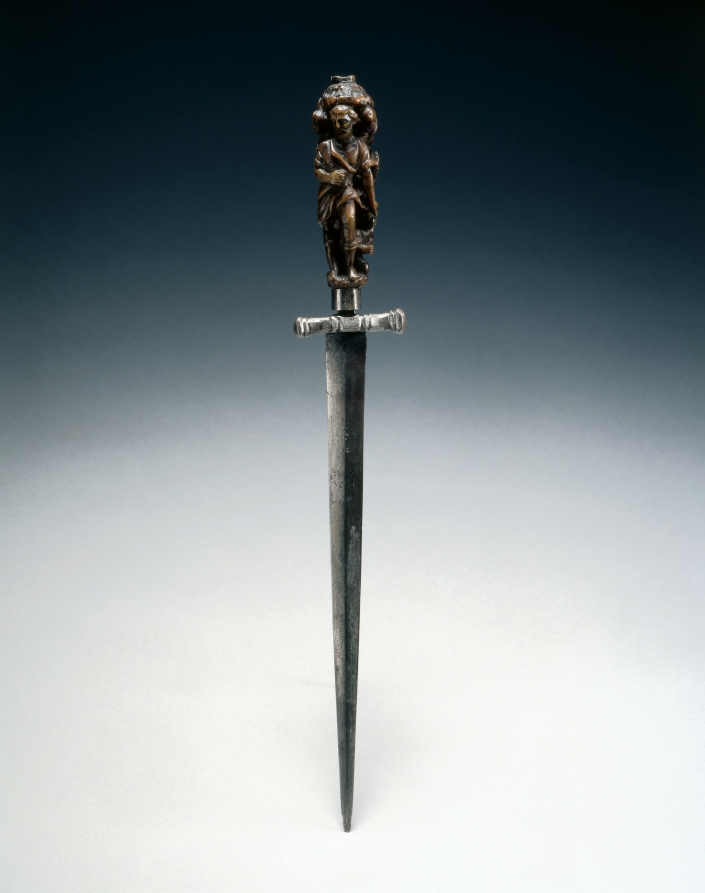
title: Dagger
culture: Italy, early 17th Century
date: early 1600s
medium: steel and horn (associated grip and blade)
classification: Arms and Armor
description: The carved grip of this dagger depicts the Old Testament story of the Sacrifice of Isaac.